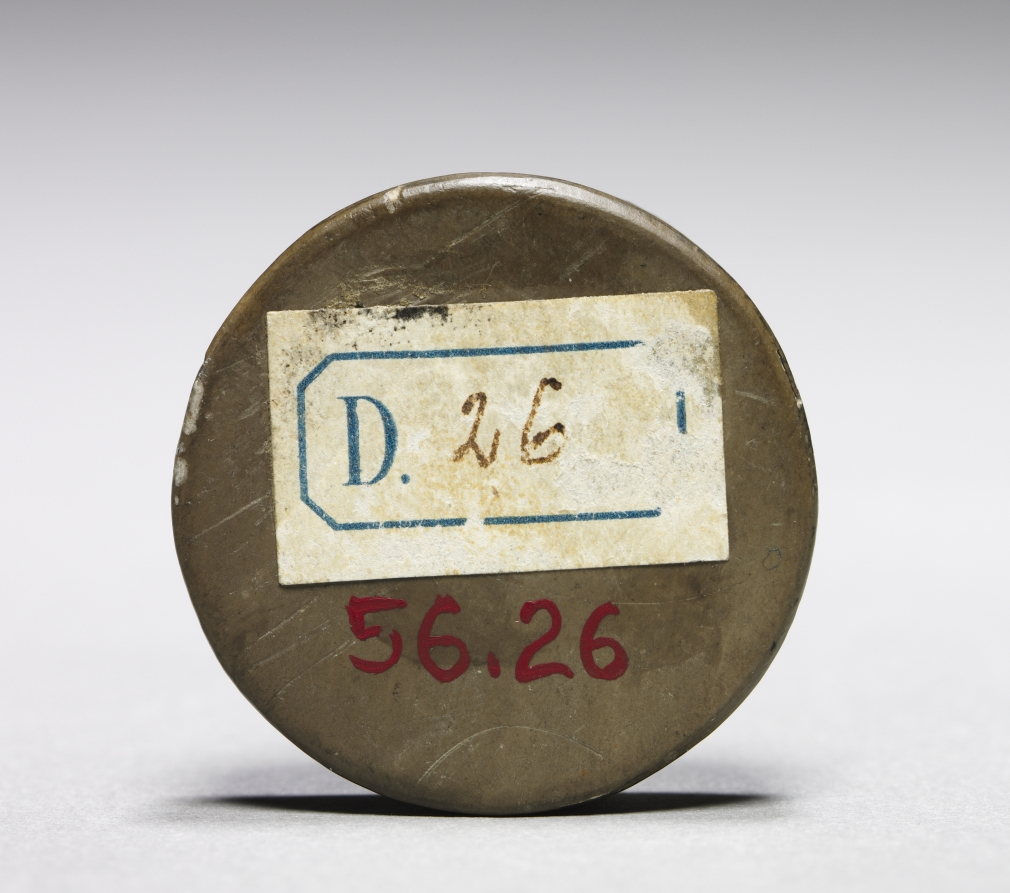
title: Model for the Reverse of the Medal of Martin III Geuder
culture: Germany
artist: Matthes Gebel (German, c. 1500–1574)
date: 1528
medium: Solnhofen limestone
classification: Sculpture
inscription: inscription: Sola Virtus, MDXXVIII (1528)